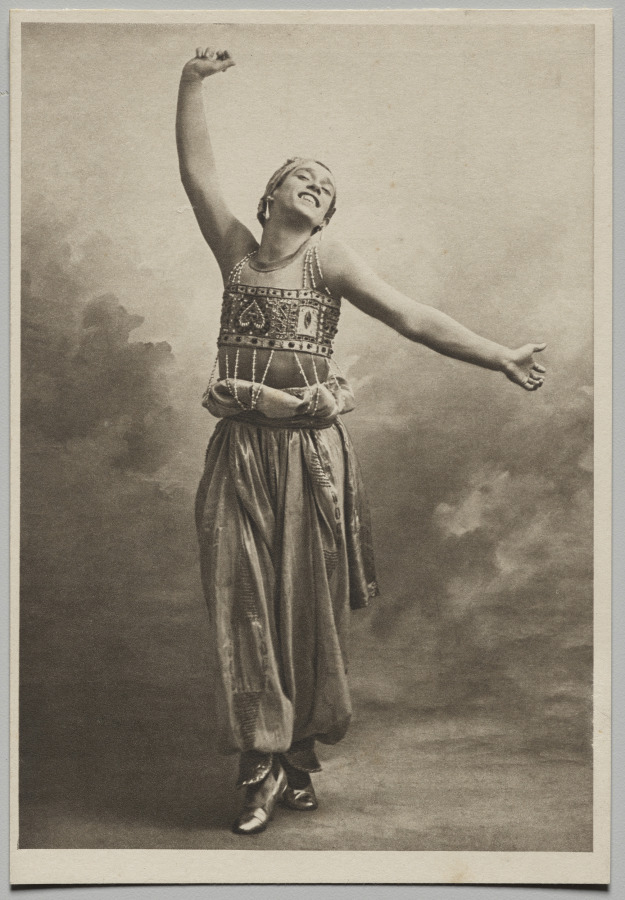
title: Vaslav Nijinsky in Scheherazade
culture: France, 20th century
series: Studies from the Russian Ballet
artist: Auguste Bert (French, 1856–before 1945)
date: 1913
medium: Halftone photogravure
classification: Photograph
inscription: Written in pencil on verso: “15 M. Nijinsky/Studies from the Russian Ballet/95”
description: Vaslav Nijinsky (1890–1950) is considered to have been the greatest male dancer of the early 20th century. Scheherazade is the story of the favorite wife of a shah who has a dalliance with her favorite slave, the role played by Nijinsky. Auguste Bert was the official photographer of the presidency of the French Republic, the country’s ministries, embassies, and its government-subsidized theaters.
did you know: Nijinsky wore gold body paint and a brightly colored, bejeweled, and embroidered outfit in his role as the Favorite Slave in Scheherazade.